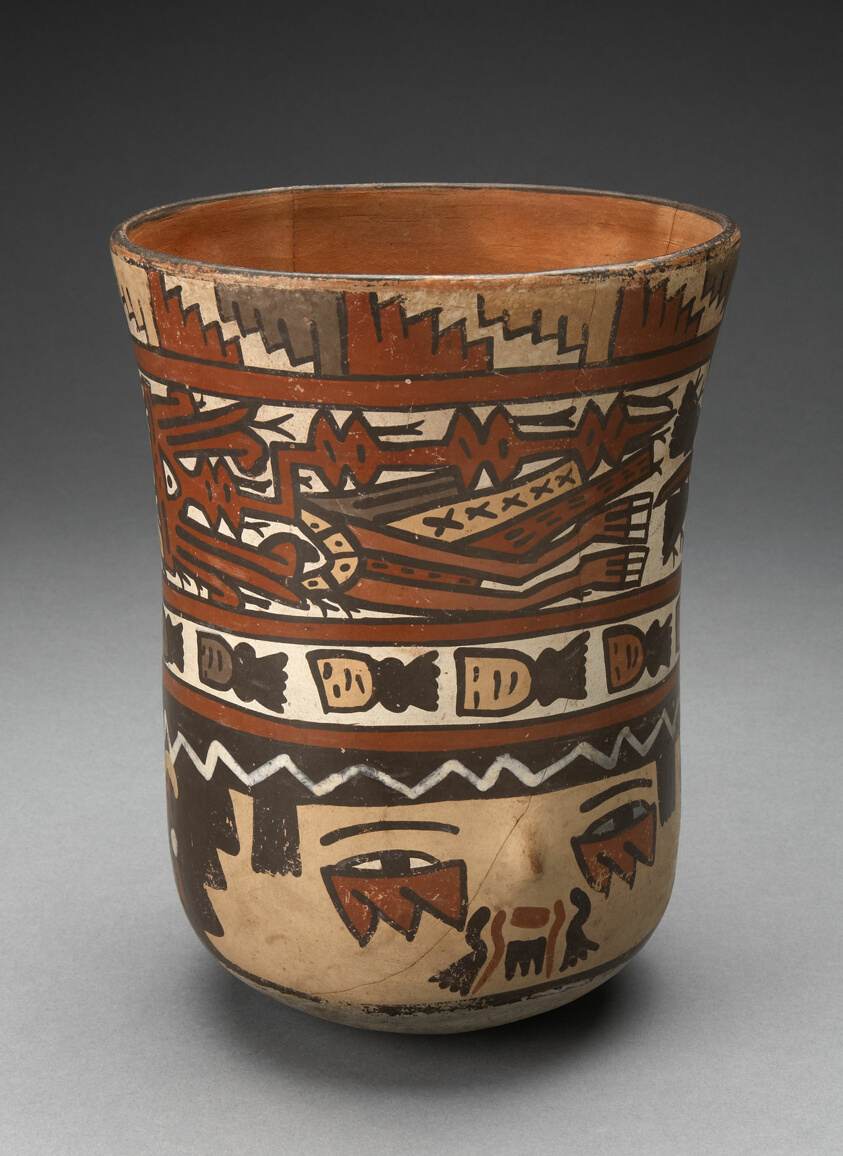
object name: Vessel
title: Beaker Depicting Human Head with Face Painting; and Abstract Costumed Figures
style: nazca, early intermediate period, Pre-Columbian, americas, Arts of the Americas, andean, andes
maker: Nazca; South coast, Peru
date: 180 BCE–500 CE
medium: Ceramic and pigment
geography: Nazca Valley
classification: earthenware; art of the americas; ceramics; vessel